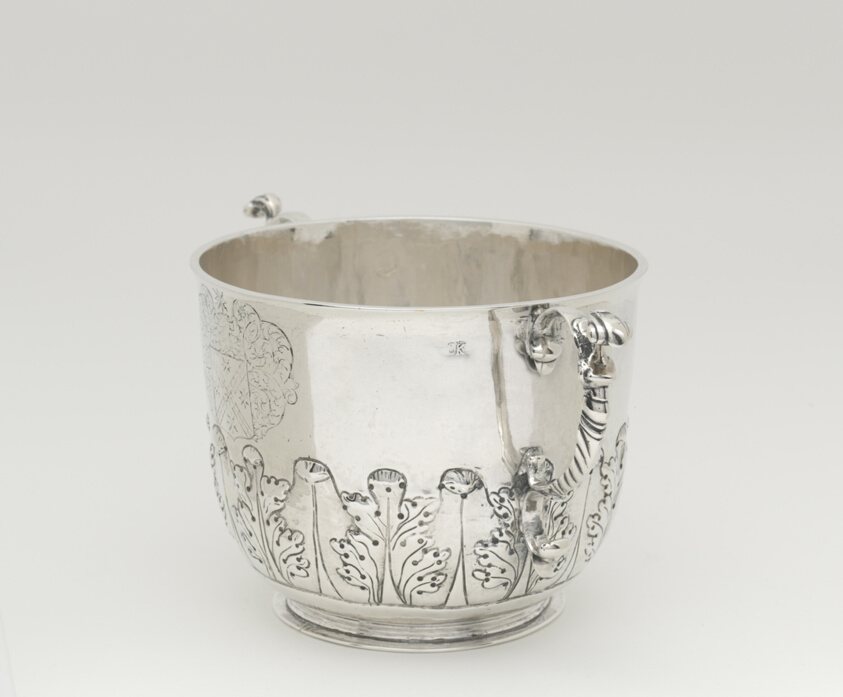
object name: Metalwork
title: Two-Handled Covered Cup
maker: Cornelius Kierstede; American, 1674–1757; New York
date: 1698–1720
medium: Silver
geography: New York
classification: drinking vessel; silver; american decorative arts; american arts; decorative arts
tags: servingware, floral, heirlooms, plant-derived motif, dining, drinking